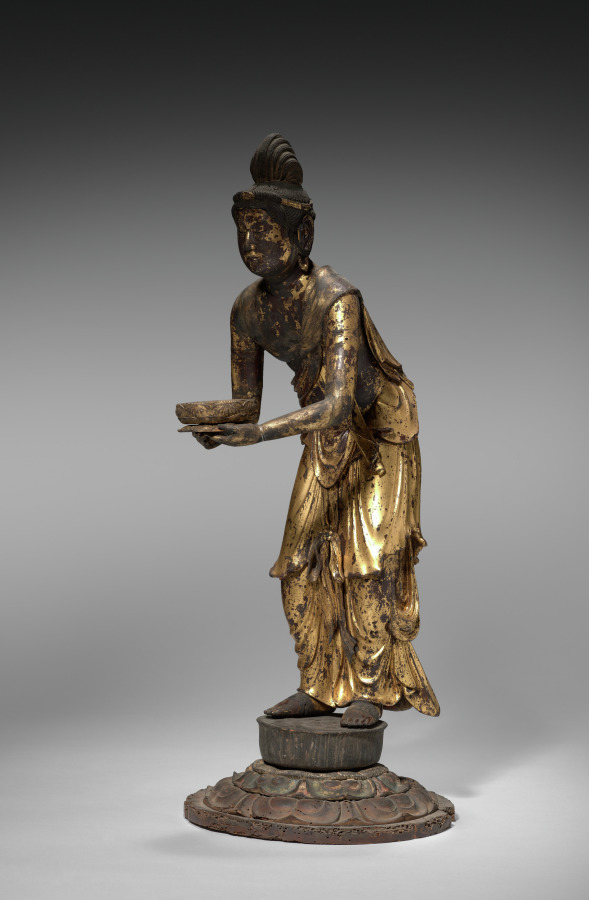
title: Kannon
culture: Japan, Kamakura period (1185–1333)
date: early 1200s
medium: wood with lacquer and gold leaf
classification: Sculpture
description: Kannon, the bodhisattva of compassion, is one of the two bodhisattvas attending Amida, the Buddha of the Western Paradise. The sculpture stands on a lotus pedestal, holding a lotus dais on which the soul of the faithful is received into paradise. The use of gold was prevalent in Buddhist art during this time—it was believed that the yellow light permeated the regions of the Amida—and Amida worship prevailed throughout Japan.